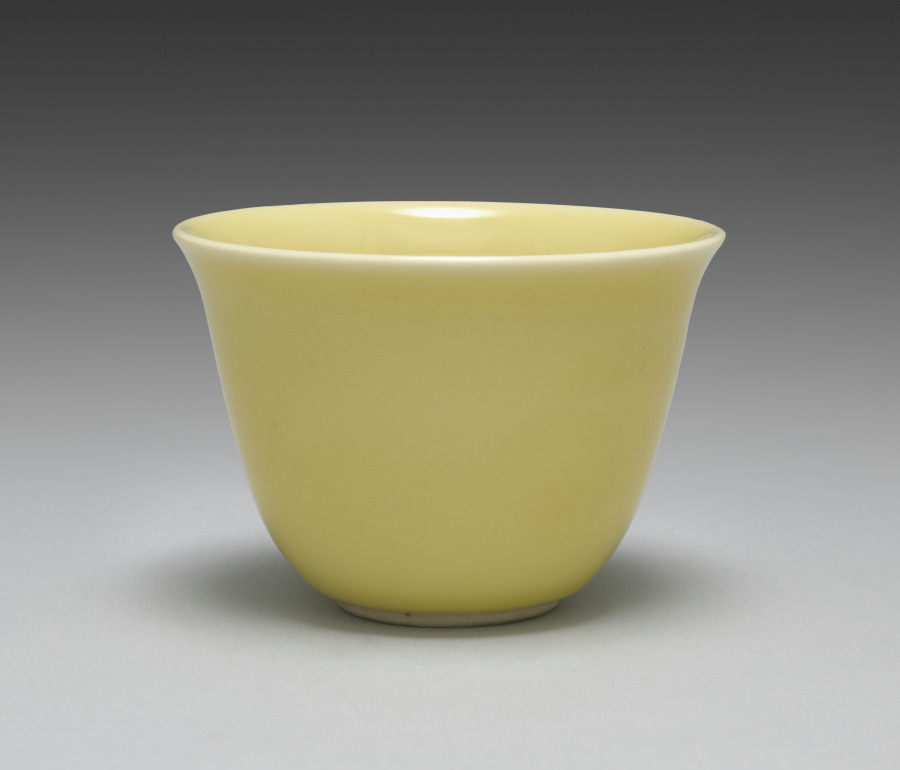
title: Cup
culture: Japan, Taishō period (1912–26) or Shōwa period (1926–89)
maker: Seifū Yohei IV (Japanese, 1872–1951)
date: 1914–46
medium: porcelain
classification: Ceramic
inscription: 清風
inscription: 清風造 【印】成山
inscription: 清風盧人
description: Like his father, Yohei IV also produced works with red or yellow monochrome glazes. His yellow-glazed works include this set of five drinking cups, a pair of sake pourers CMA 2022.216, and a sweets bowl molded into the shape of a chrysanthemum CMA 2022.218.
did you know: Seifū Yohei IV learned the ceramics industry from his father and painting from Tanomura Shosai.